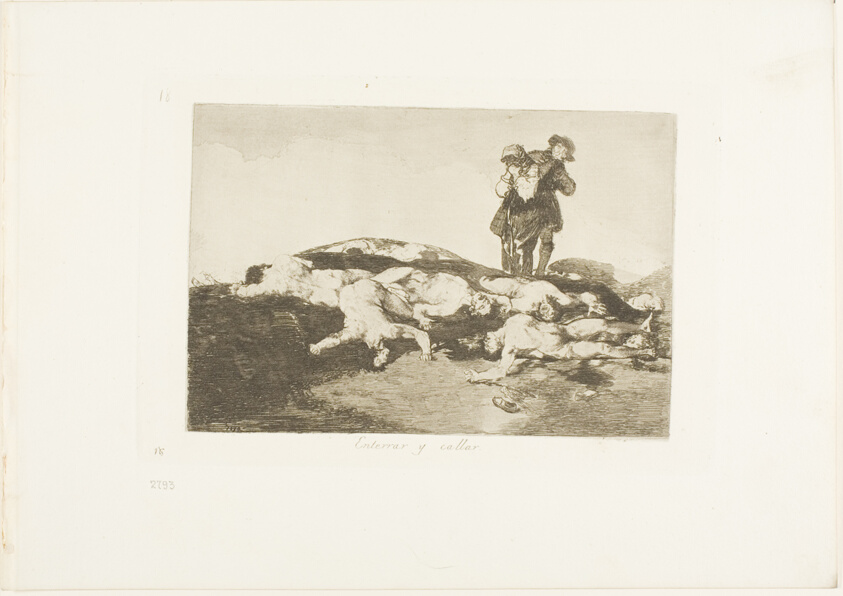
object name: Print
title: Bury them and keep quiet, plate 18 from The Disasters of War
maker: Francisco José de Goya y Lucientes (Spanish, 1746-1828)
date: 1810/12, published 1863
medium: Etching, burnished lavis, drypoint and burin on ivory wove paper with gilt edges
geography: Spain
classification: etching; print; prints and drawing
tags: war